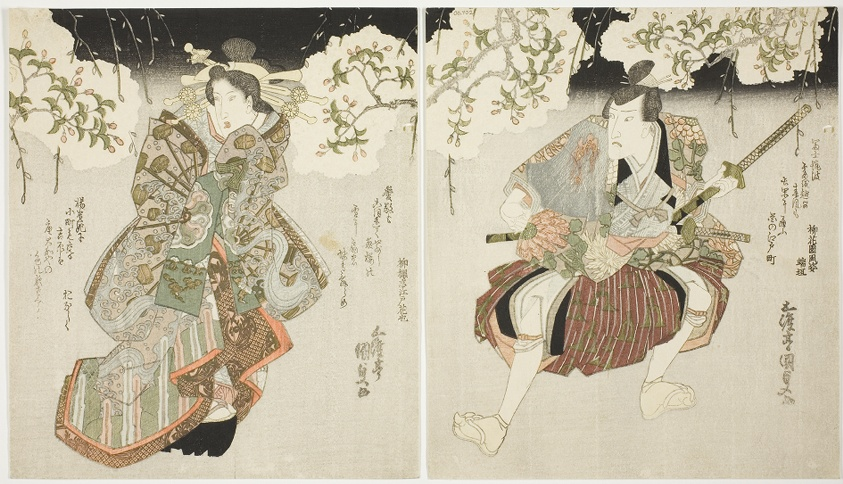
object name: Print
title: The actors Onoe Kikugoro III (R) as Nagoya Sanza and Iwai Kumesaburo II (L) as the courtesan Katsuragi in the play "Oichiza Soga no Shimadai," performed at the Kawarazaki Theater in the first month, 1827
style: Japanese (culture or style)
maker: Utagawa Kunisada I (Toyokuni III) (Japanese, 1786-1864)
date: 1827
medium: Color woodblock print; right and center sheets of shikishiban triptych, surimono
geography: Japan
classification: print; asian art